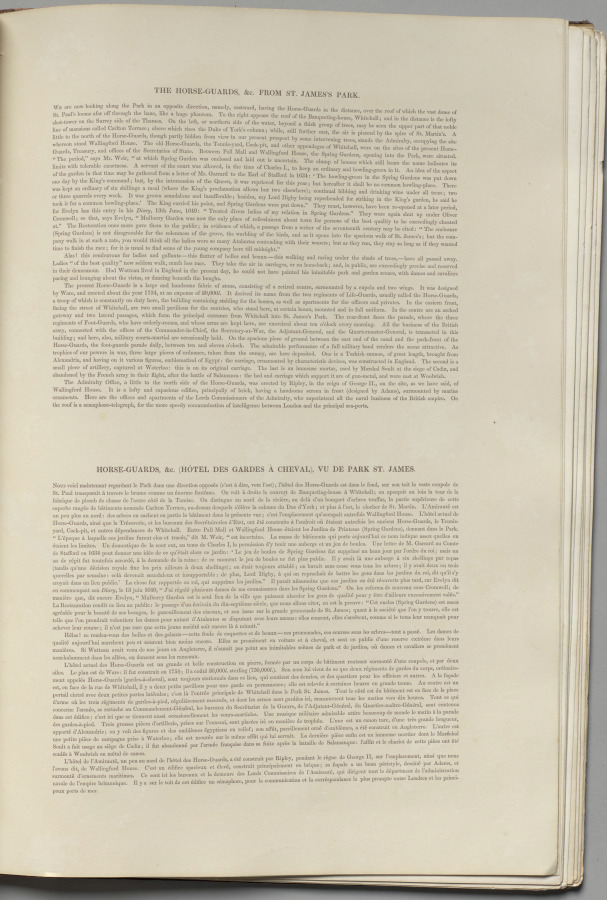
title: London As It Is: The Horse-Guards, from St. James's Park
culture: England, 19th century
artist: Thomas Shotter Boys (British, 1803–1874)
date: 1842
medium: lithograph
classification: Bound Volume